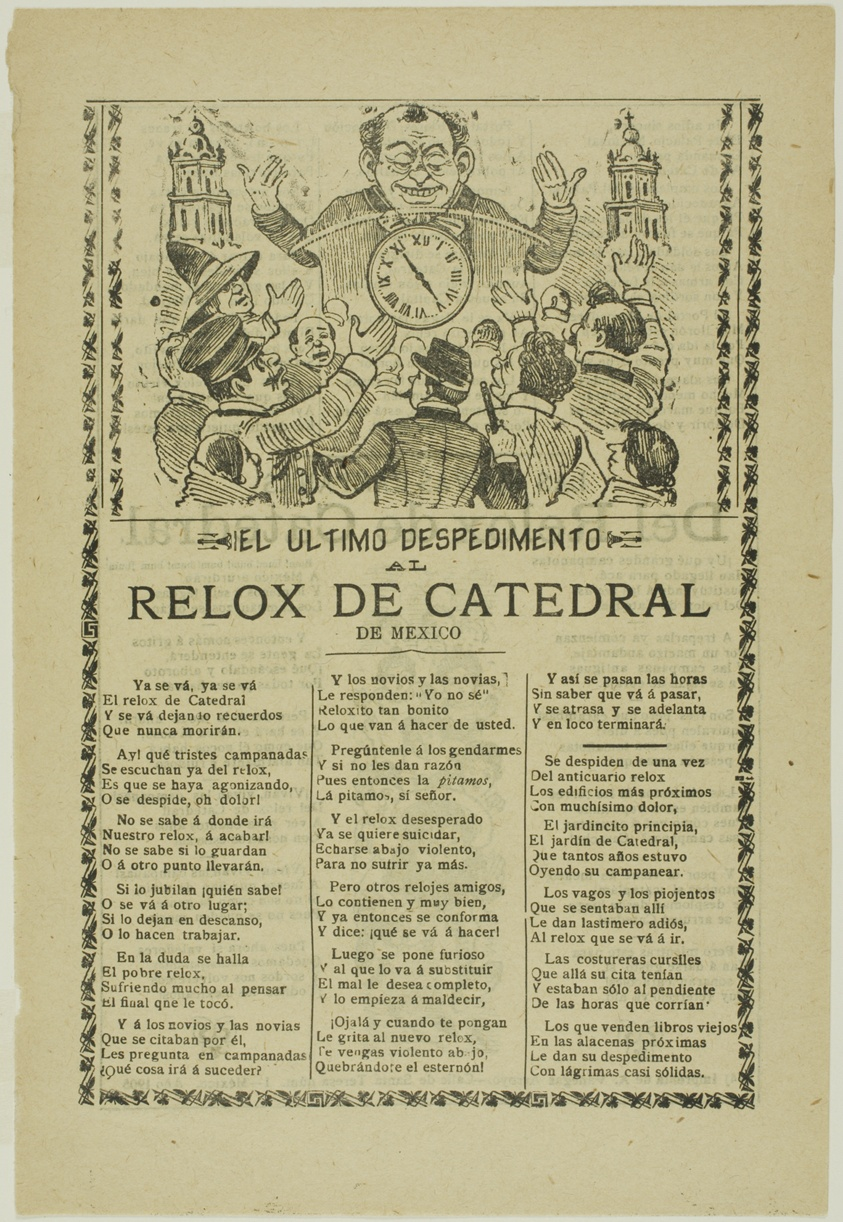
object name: Print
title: Relox Cathedral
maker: José Guadalupe Posada (Mexican, 1852-1913)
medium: Lithograph on paper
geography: Mexico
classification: lithograph; print; prints and drawing